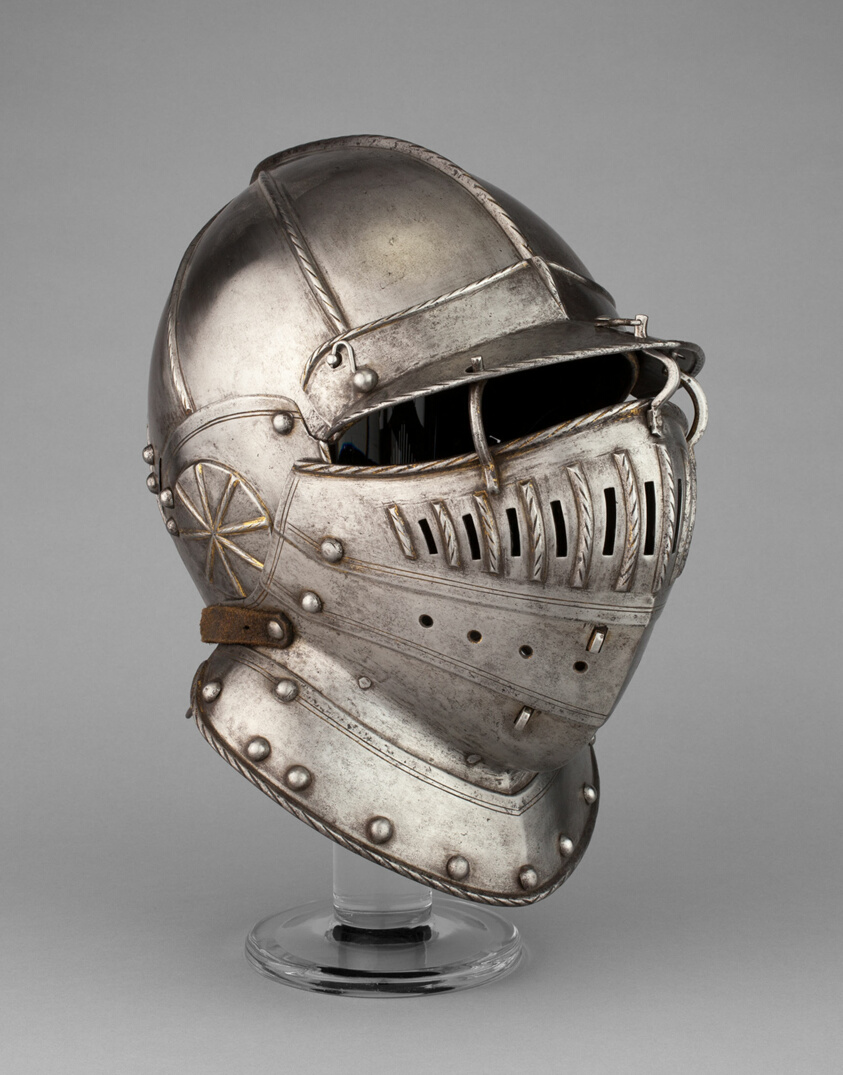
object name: Armor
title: Burgonet with Falling Buffe possibly from an Armor of William Herbert, Earl of Pembroke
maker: English; Greenwich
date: c. 1555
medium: Steel, gilding, and leather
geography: Greenwich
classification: suit-helmet; armor; arms and armor